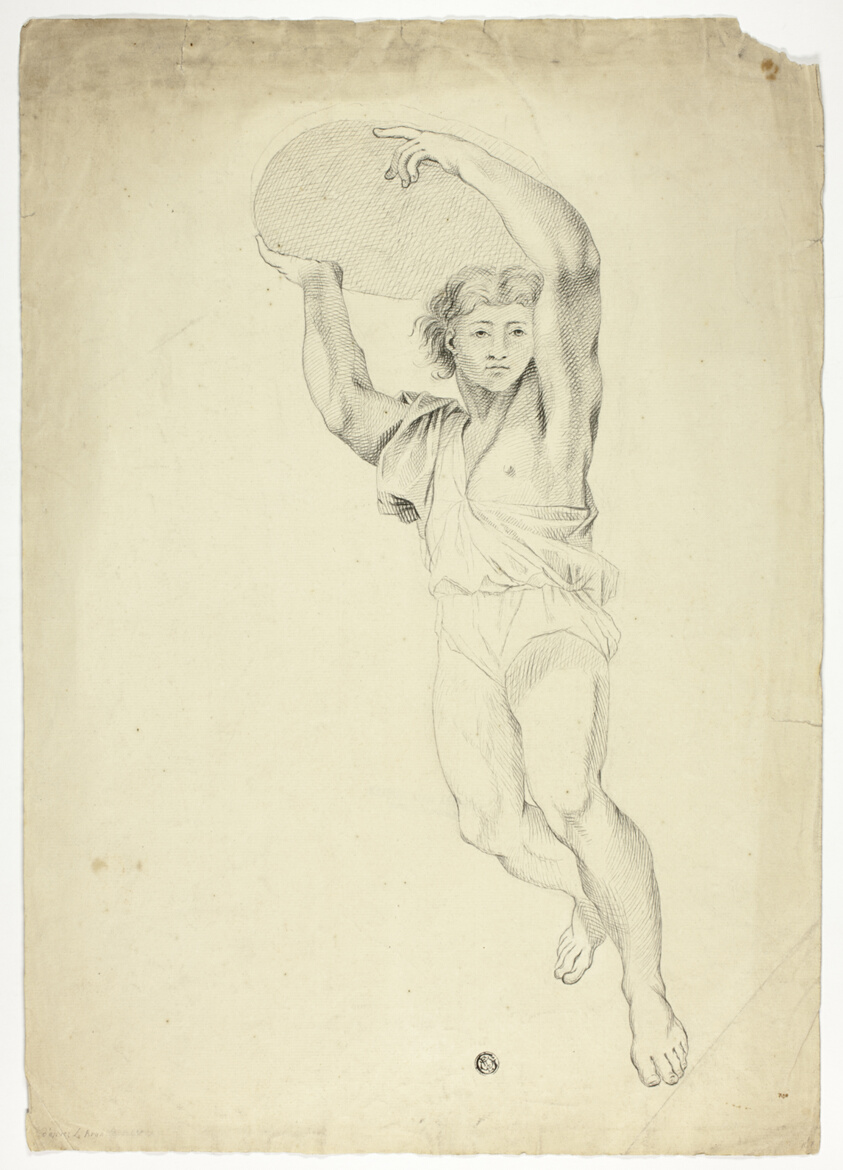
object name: Drawing and Watercolor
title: Boy Carrying Weight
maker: After Charles Le Brun; French, 1619-1690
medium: Pen and black ink on cream laid paper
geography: France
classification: pen and ink drawings; paper; drawings (visual works); prints and drawing